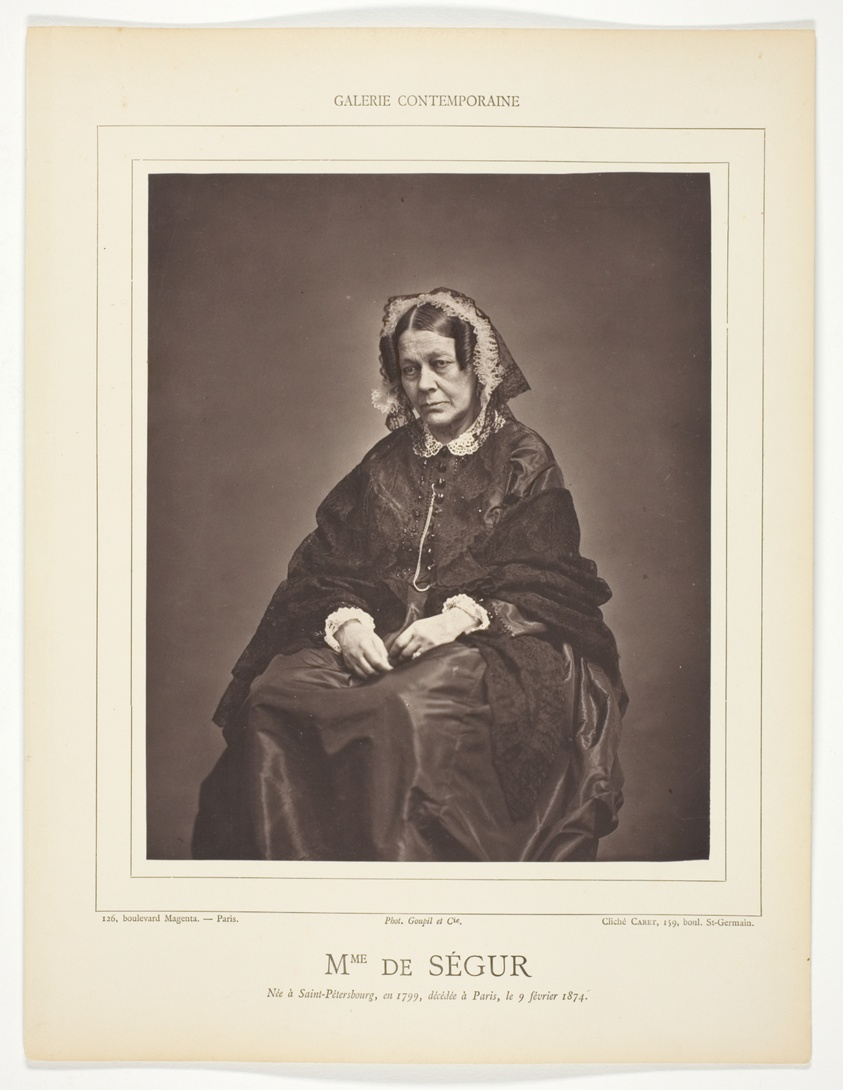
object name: Photograph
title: Mm. de Ségur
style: 19th century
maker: Caret Caret; French, 19th century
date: c. 1874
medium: Woodburytype, from the periodical “Galerie Contemporaine Littéraire, Artistique” (1878), volume 6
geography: France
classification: woodburytype; photomechanical process; photography; photograph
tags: Collected by Hugh Edwards, Paris, Contemporaine Littéraire